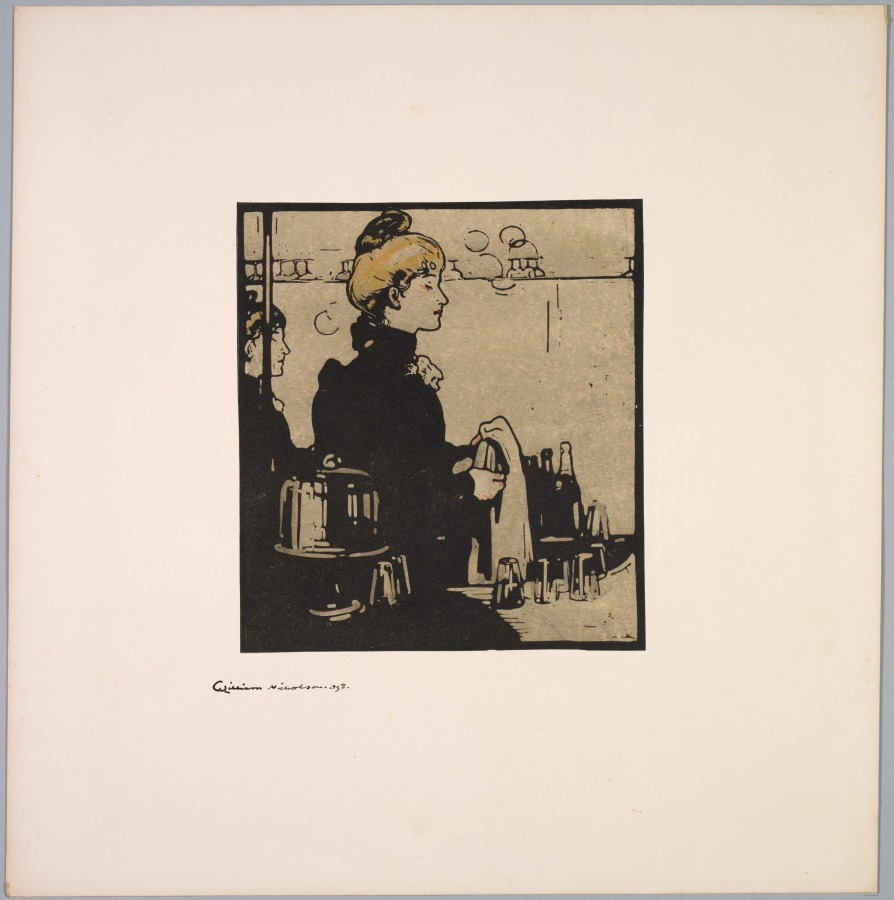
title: London Types: Barmaid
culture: England, 19th century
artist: William Nicholson (British, 1872–1949)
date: 1898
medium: woodcut hand-colored with watercolor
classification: Print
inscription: lower left margin, in black ink: William Nicholson - 1898 -